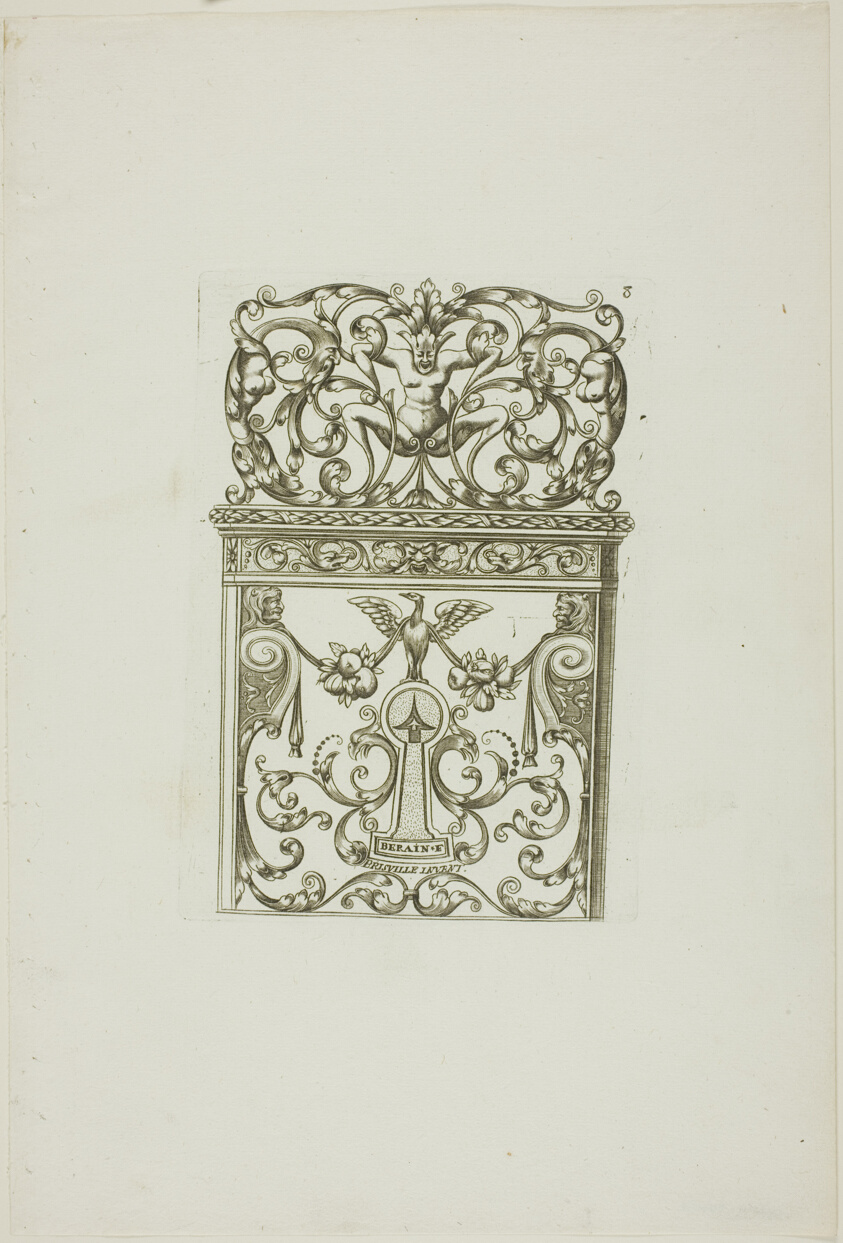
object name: Print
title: Designs for Locksmiths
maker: Jean Bérain I (French, 1640-1711); after Hugues Bris e Ville (French)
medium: Etching on paper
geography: France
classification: etching; print; prints and drawing